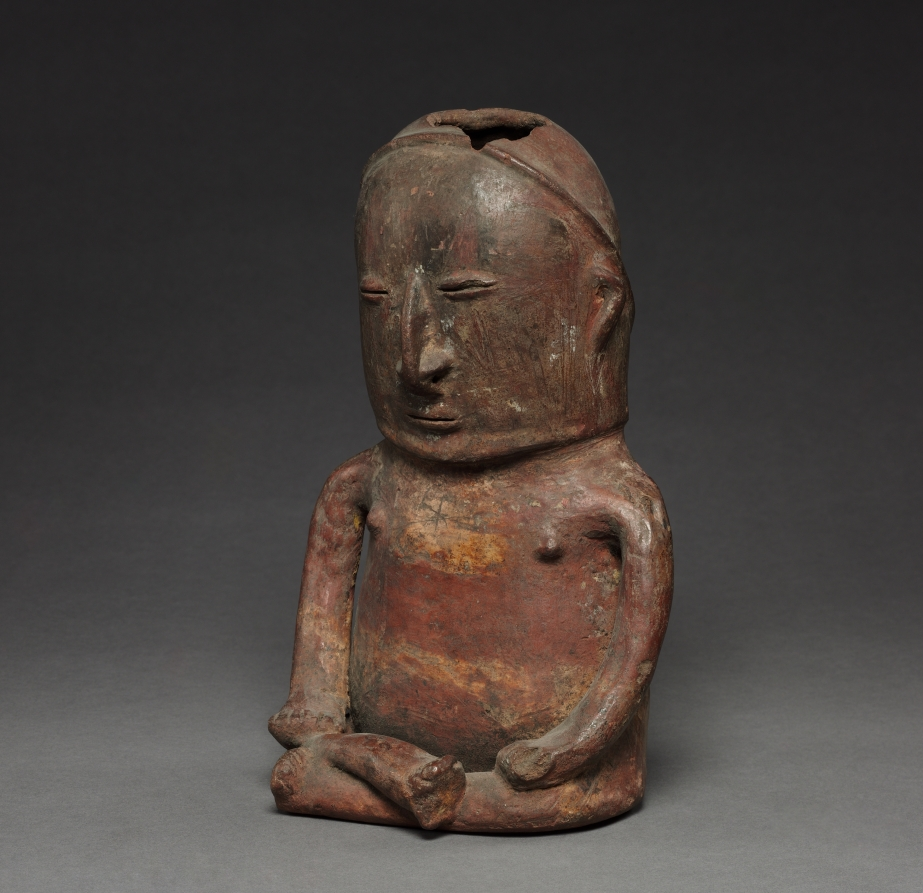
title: Seated Figure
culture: Colombia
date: before 1921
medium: red ware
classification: Ceramic